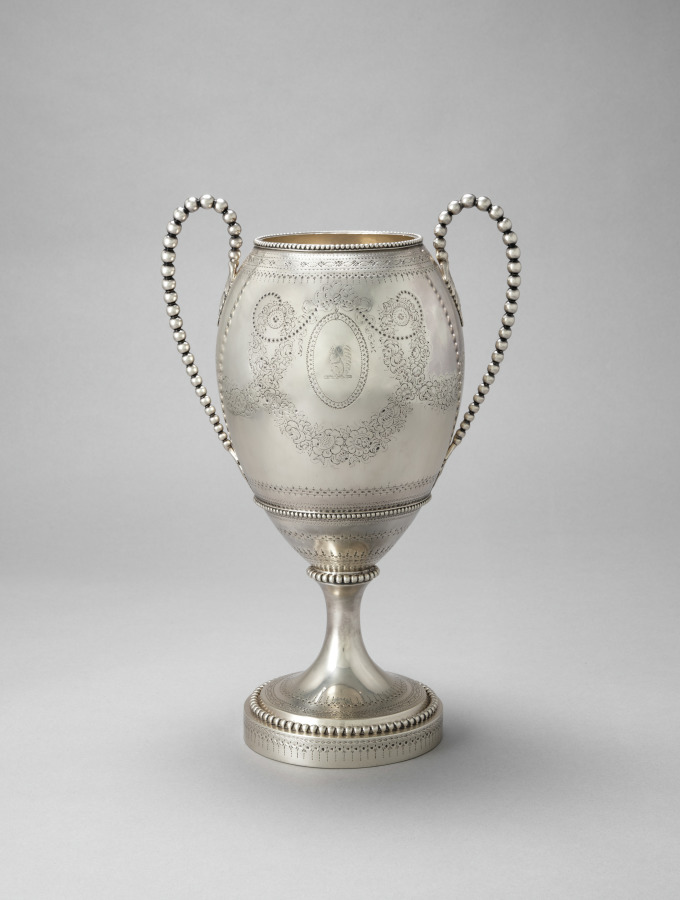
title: Tea Urn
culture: England, London, 18th century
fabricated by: Henry Greenway (British)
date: 1781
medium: silver and ivory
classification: Silver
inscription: engraved on body: coat of arms-- tower surrounded by three covered cups; crest consisting of a squirrel. Engraved on cover: crest consisting of a squirrel (coat of arms of Amcotts family).